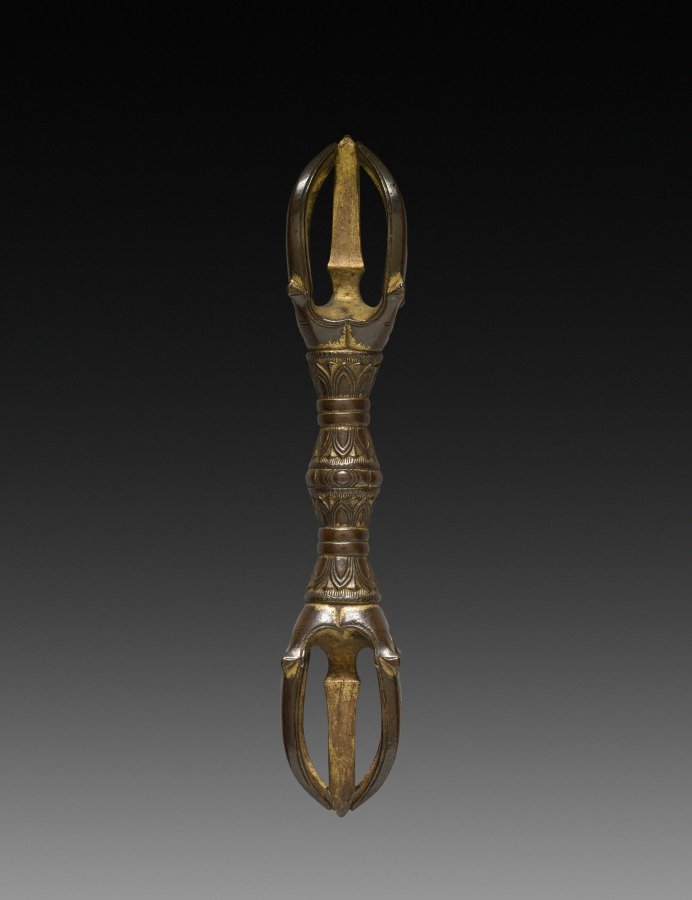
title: Goko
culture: Japan, Edo period (1615–1868)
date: 1700s-1800s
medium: gilt copper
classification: Metalwork